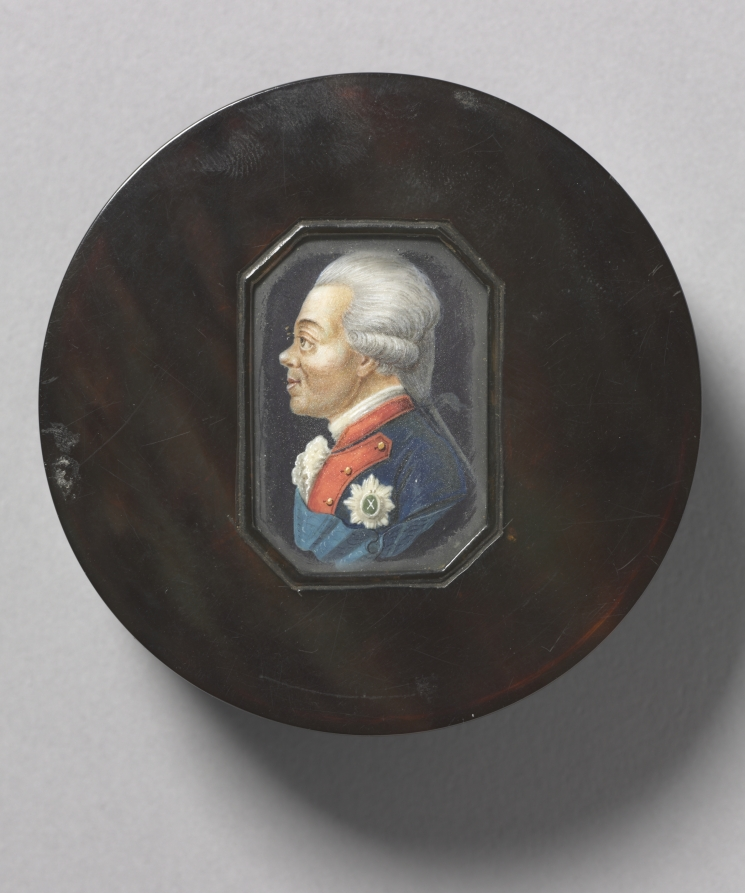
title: Snuff Box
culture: Continental, early 19th century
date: c. 1800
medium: tortoiseshell box with painted portrait miniature under glass, inset on cover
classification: Miscellaneous